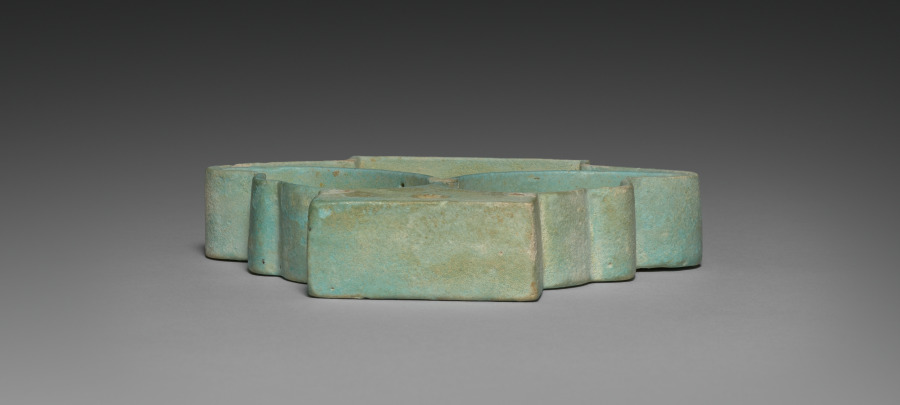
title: Box (Pyxis) in the Form of a Composite Capital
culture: Egypt, Greco-Roman period (332 BCE–395 CE), Ptolemaic dynasty (305–30 BCE)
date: 305–30 BCE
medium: pale robin's-egg blue faience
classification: Vessels